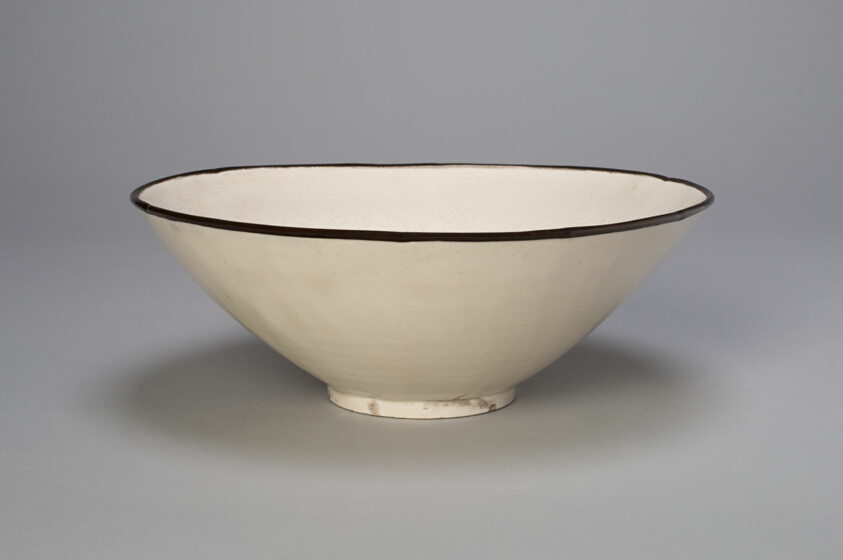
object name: Vessel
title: Bowl with Boys Playing amid Peony Blossoms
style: Chinese (culture or style)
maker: China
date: Jin dynasty (1115–1234), 12th century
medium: Ding ware; porcelain with underglaze molded decoration; metal rim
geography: China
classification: bowl; porcelain; dish (vessel); ceramics; asian art; vessel